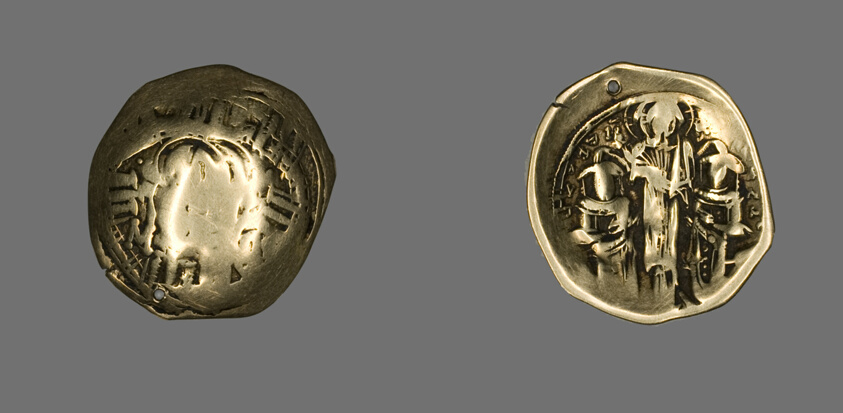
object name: Coin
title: Hyperpyron (Coin) of Andronicus II Palaeologus and Michael IX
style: byzantine, european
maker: Byzantine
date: 1282-1328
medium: Gold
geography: Byzantine Empire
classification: coin; ancient art